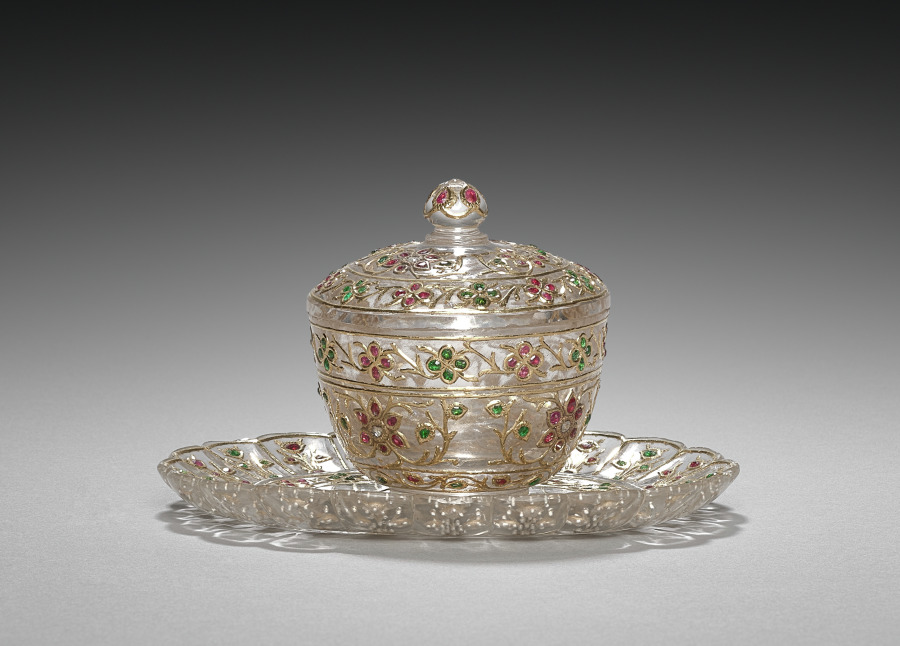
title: Jar with Cover and Saucer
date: 1700s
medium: crystal set with gold and jewels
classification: Jewelry